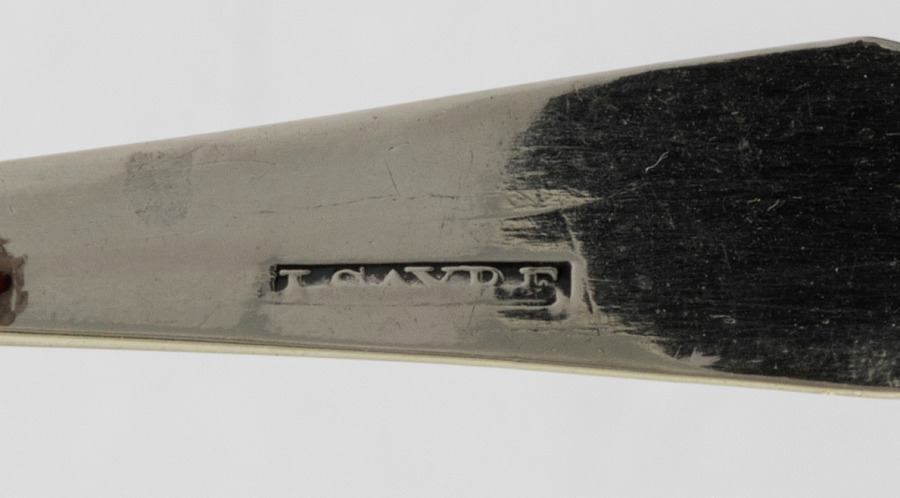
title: Sugar Tongs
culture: America, New York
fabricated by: John Sayre (American, 1771–1852)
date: c. 1800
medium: silver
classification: Silver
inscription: engraved "BMH" in bright-cut script within reserve on bow.